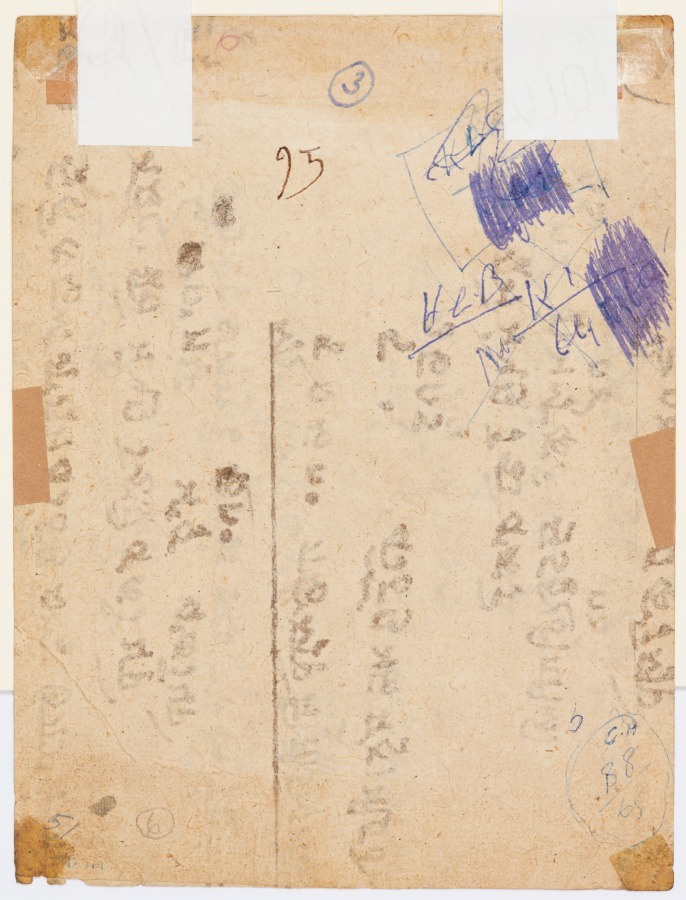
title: A Mandi royal family member receives a noble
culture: Northern India, Pahari kingdoms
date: c. 1700–1720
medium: Gum tempera and silver on paper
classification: Painting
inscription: 18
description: Two nobles dressed in royal apparel greet each other. The man in a pine green jama folds his hands in supplication to the one clad in a mauve robe. The man on the left is probably a raja, as he adorns his turban with a royal plume and raises his hand to bless the other.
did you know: The man in mauve robe wears a Mughal sash bearing embroidered flowering plants.